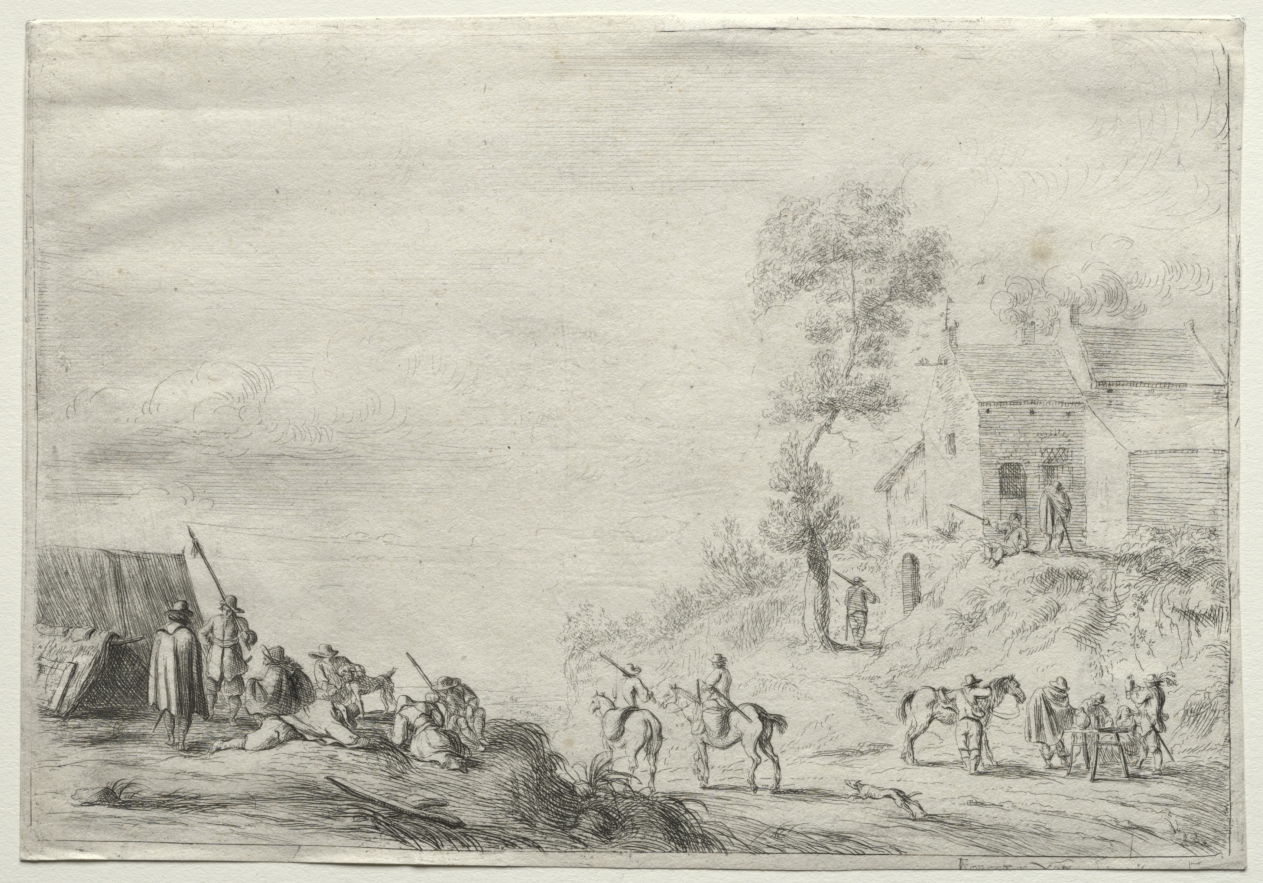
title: The Outpost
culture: Flanders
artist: Robert van den Hoecke (Flemish, 1622–1668)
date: 1632–68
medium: etching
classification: Print